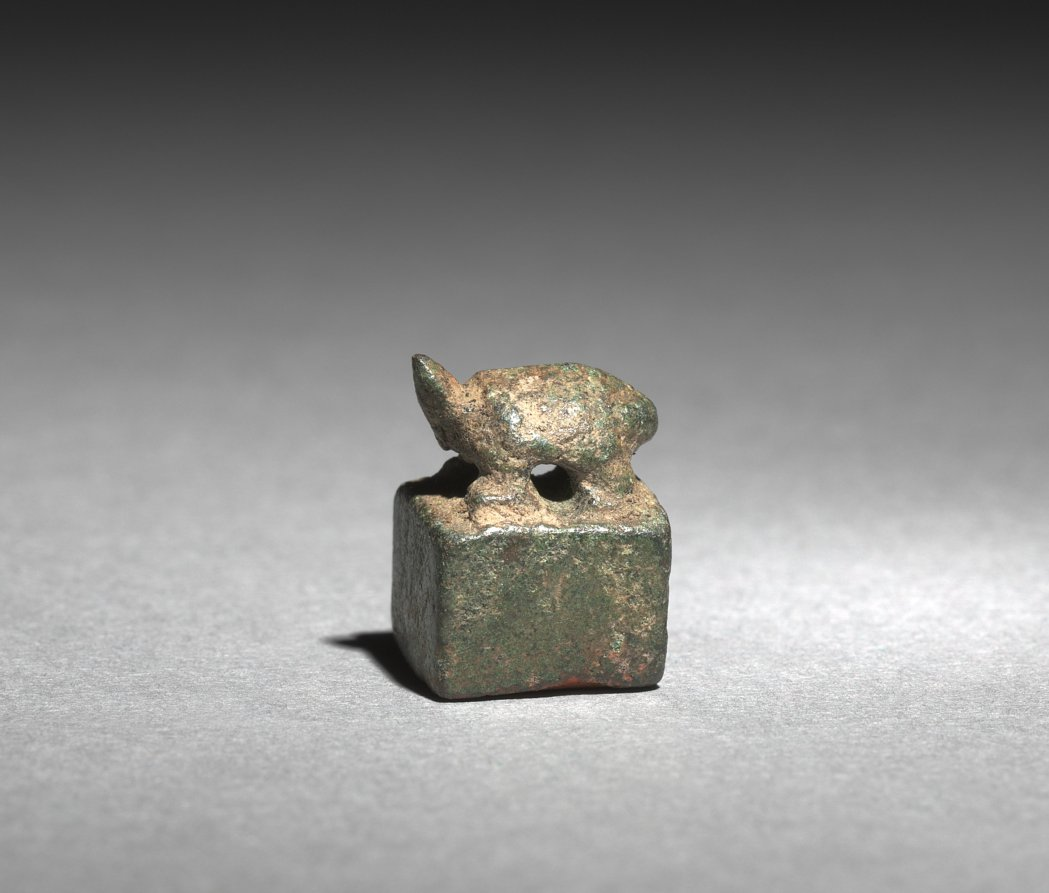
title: Seal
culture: Korea, Goryeo dynasty (918–1392)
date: 918–1392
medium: bronze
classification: Metalwork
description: A large quantity of bronze seals were excavated from tombs of the Goryeo dynasty. This seal bears two inscribed characters:子成, meaning "generational success." The red cinnabar paste is still visible, indicating it must have been used for signing various documents while its owner was alive.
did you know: A large quantity of bronze seals excavated from tombs of the Goryeo dynasty is closely related to the development of metallurgy in 13th-century Korea that allowed the transition from wood type to movable metal type printing.